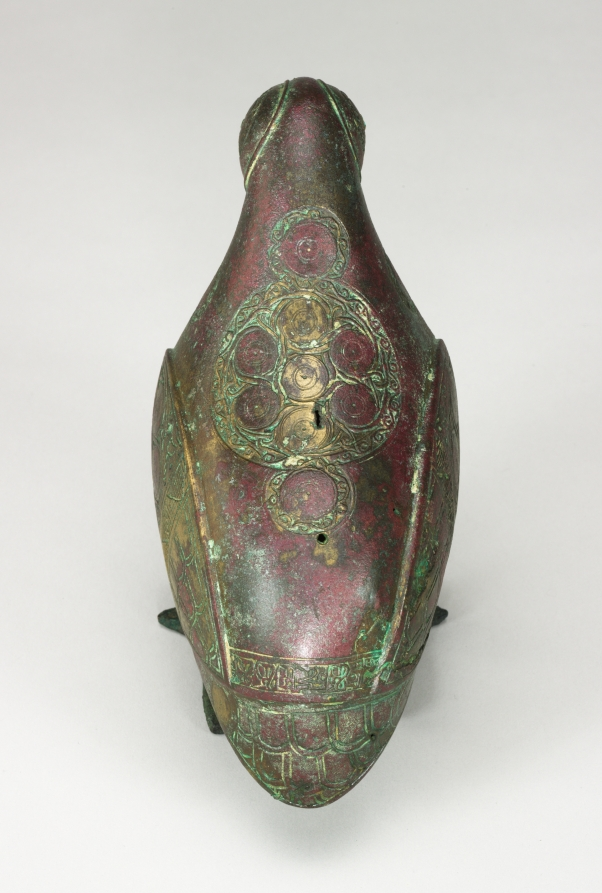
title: Bird-shaped Vessel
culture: Iran, Seljuq period (1037–1194)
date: 1100s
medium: bronze, cast, with chased and chiseled decoration; eyes inlaid with blue glass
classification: Metalwork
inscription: Kufic inscription above tail feathers, undeciphered, possibly pseudo-inscription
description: This bird-shaped vessel may have been used as a medieval water vessel (aquamanile) for pouring water used in handwashing—an important element of secular and sacred rituals. In this piece, water could have been placed in the vessel through a hole in the bird’s chest and then poured out through the hinged beak. Birds in Islamic art often represented messengers and protectors, or symbolized freedom of the spirit and soaring of the soul. Possibly the blue-green eyes were considered good luck charms to protect the owner from the evil eye and to ward off misfortune.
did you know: There is an undeciphered Kufic inscription above the bird's tail feathers.